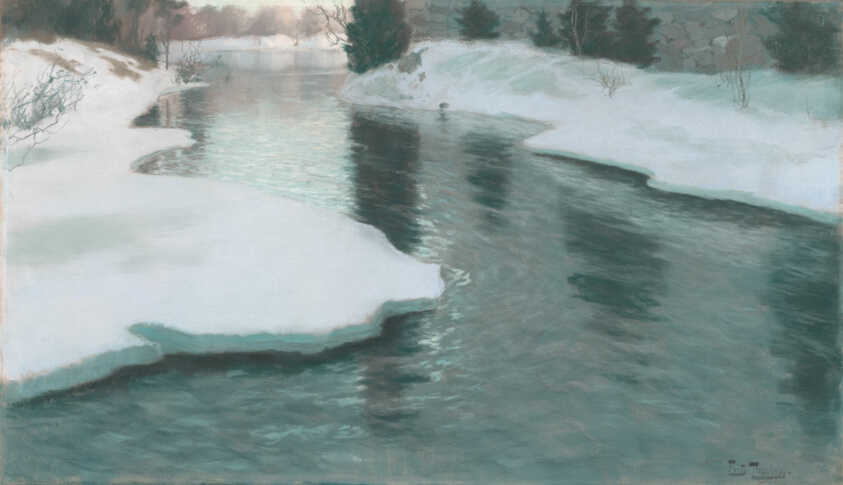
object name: Drawing and Watercolor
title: Melting Snow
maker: Frits Thaulow (Norwegian, 1847-1906)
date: 1887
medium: Pastel on tan wove paper, laid down on canvas and wrapped around a strainer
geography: Norway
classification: pastel; drawings (visual works); prints and drawing